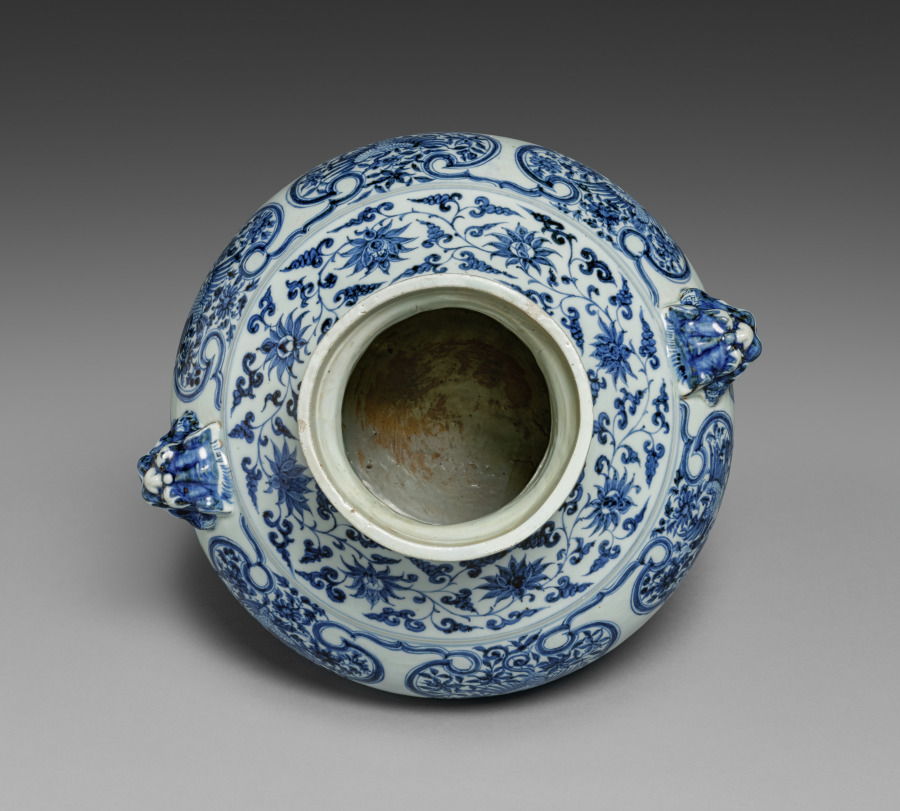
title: Jar with Lion-Head Handles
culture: China, Jiangxi Province, Jingdezhen, Yuan dynasty (1271–1368)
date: 1300s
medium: porcelain with underglaze painted decoration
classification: Ceramic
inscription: 南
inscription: 宮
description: Appreciated for its strong profile, brilliant blue color, and firm delineation of the decorative patterns, this jar is a classic example of Yuan dynasty blue-and-white ware. This type of ware was produced no later than the 1330s for both domestic use (the court and common people alike) and overseas trade. This example testifies to the transmission of artistic ideas and techniques between China and the rest of the great Mongol Empire as a result of trade. The cobalt that was used for the blue underglaze decoration was imported from Iran, likely from Kashan. The band of cloud-collar motifs with phoenixes set against floral grounds, as shown here, is an artistic vocabulary that can also be found in Iranian decorative arts of the Ilkhanid period (1256–1353).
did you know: The characters for "palace" and "south" are scratched into the white glaze on the vessel's shoulder, suggesting that it was once kept in a specific location in a palace.